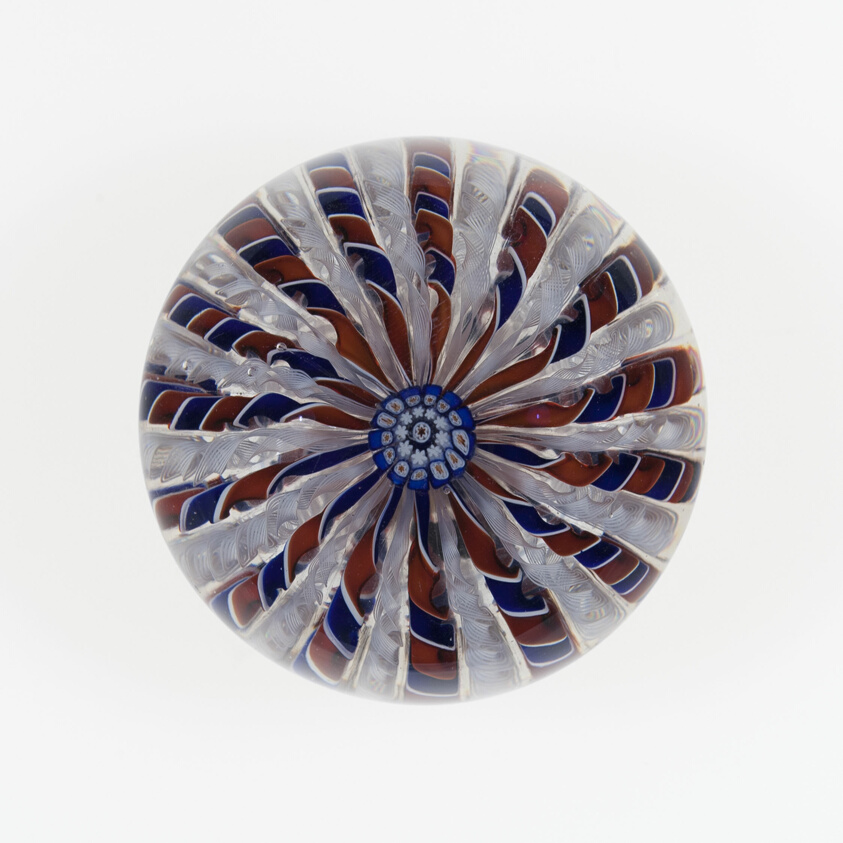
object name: Glass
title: Paperweight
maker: Clichy Glassworks (Cristalleries de Clichy); Clichy, France, 1837-1885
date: c. 1845–60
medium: Glass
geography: Clichy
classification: paperweight; glass